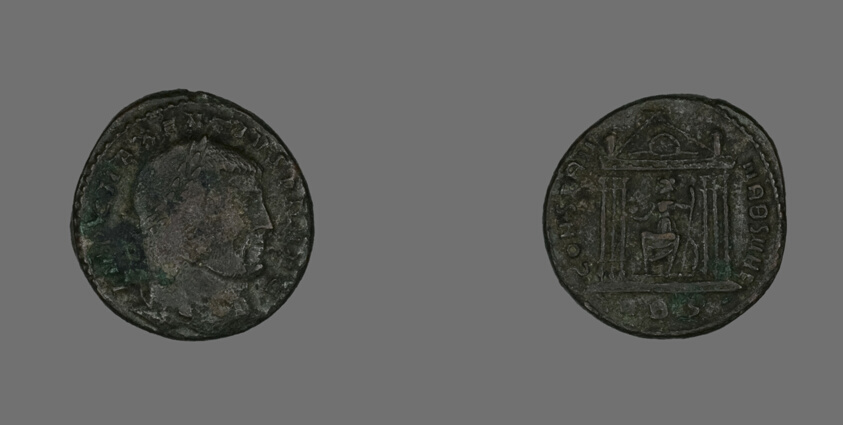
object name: Coin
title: Follis (Coin) Portraying Emperor Maxentius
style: roman (ancient, style or period)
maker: Roman, minted in Rome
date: 309-312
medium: Bronze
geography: Roman Empire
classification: coin; ancient art